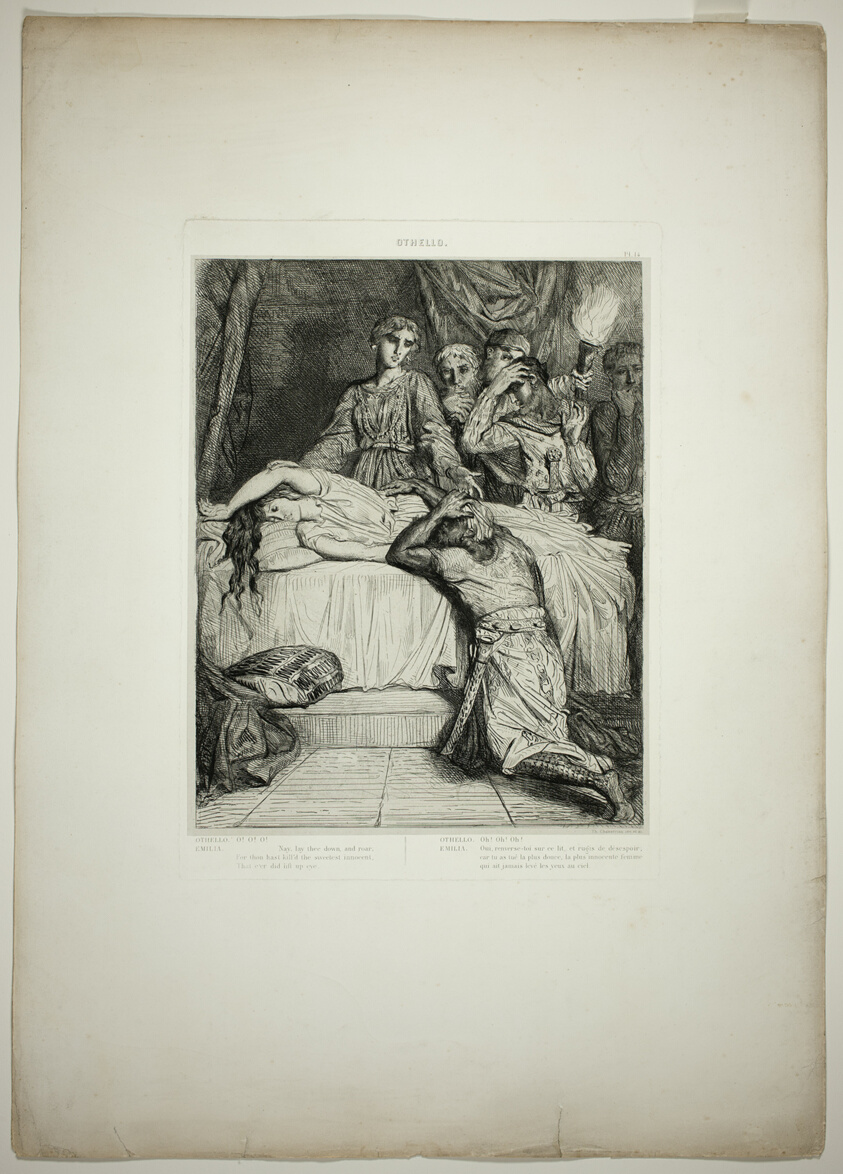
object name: Print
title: Oh! Oh! Oh!, plate fourteen from Othello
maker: Théodore Chassériau (French, 1819-1856)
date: 1844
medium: Etching, engraving, and roulette on paper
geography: France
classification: etching; print; prints and drawing